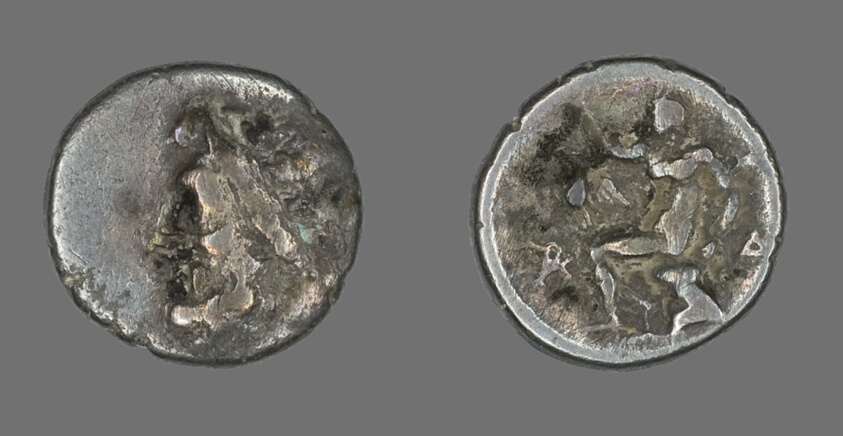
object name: Coin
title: Hemidrachm (Coin) Depicting the God Zeus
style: greek, ancient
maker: Greek, minted in Megalopolis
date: after 371 BCE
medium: Silver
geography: Megalópolis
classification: coin; ancient art